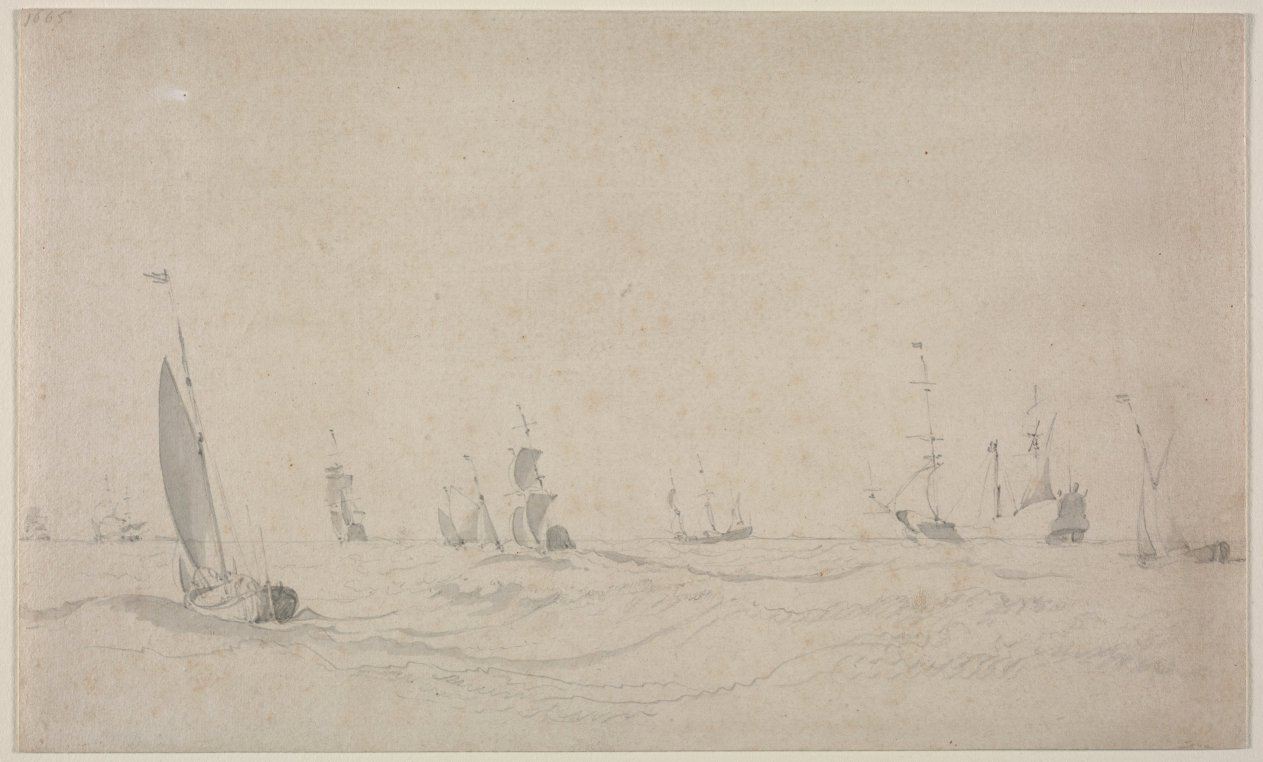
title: Shipping on a Rough Sea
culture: Netherlands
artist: Willem van de Velde (Dutch, c. 1611–1693)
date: 1665?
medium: brush and gray wash and graphite, white gouache (upper left, medium unrelated to composition)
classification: Drawing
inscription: [by artist?], upper left, in graphite: 1665 ; VERSO OF SECONDARY SUPPORT, lower center, in graphite: 9 1/4 x 15 1/2 ; lower center, in graphite: 12 ; lower right, in graphite: Coll. of P W Cooke